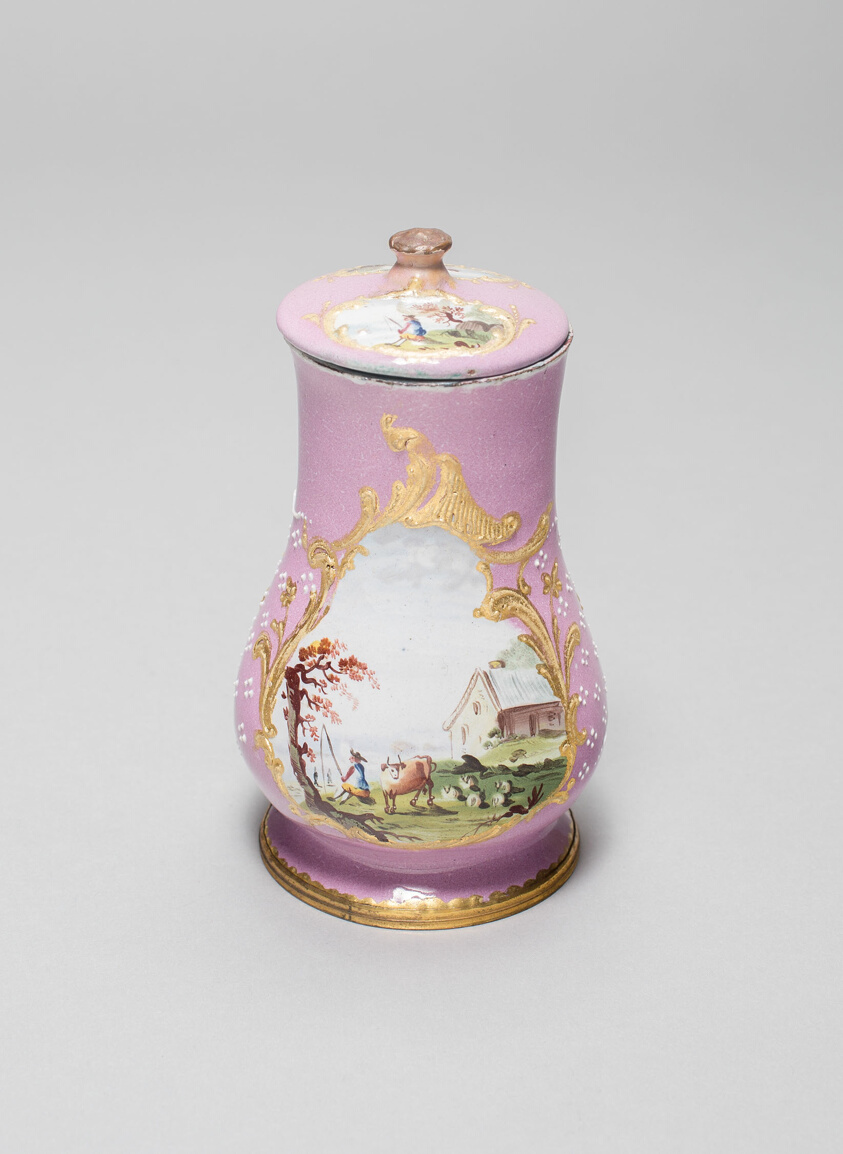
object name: Metalwork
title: Mustard Pot and Cover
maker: Bilston, England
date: c. 1770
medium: Copper, polychrome enamel, and gilding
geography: England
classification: enamel; metalwork